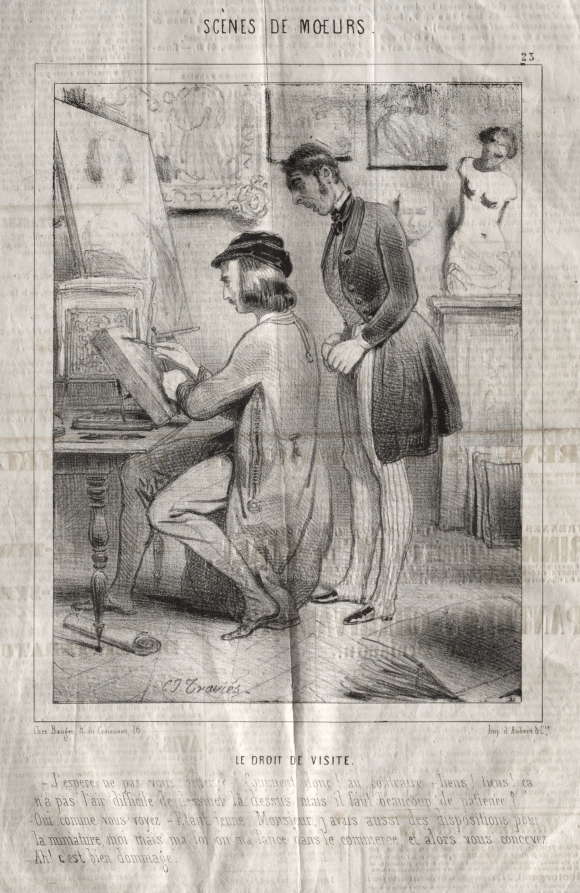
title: Scènes de moeurs: La Droit de visite. J'espère ne pas vous gener?...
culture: France, 19th century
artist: Charles Joseph Traviès de Villers (French, 1804–1859)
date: c. 1830–45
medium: lithograph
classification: Print